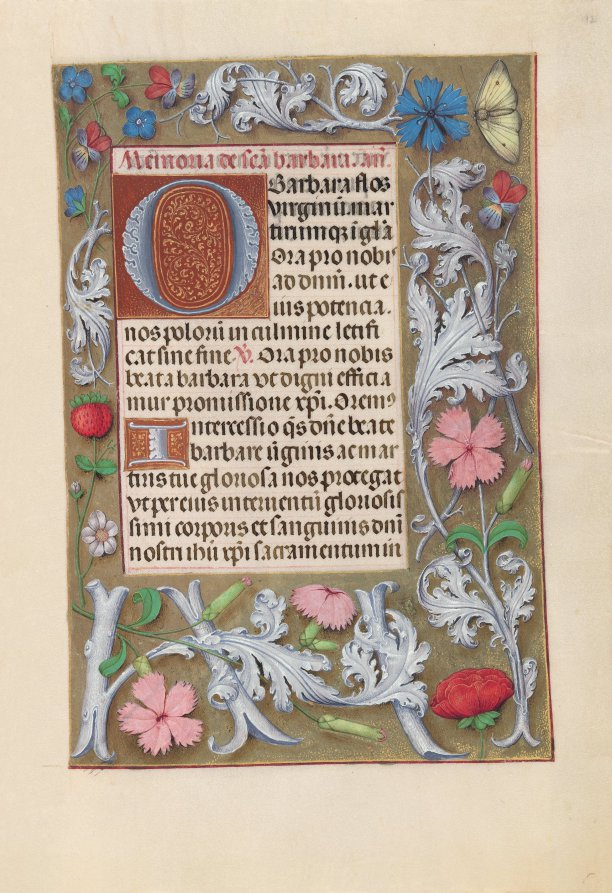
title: Hours of Queen Isabella the Catholic, Queen of Spain: Fol. 192r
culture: Flanders, Ghent and Bruges, late 15th century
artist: Master of the First Prayerbook of Maximillian (Flemish, c. 1444–1519)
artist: and Associates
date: c. 1500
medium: ink, tempera, and gold on vellum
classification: Bound Volume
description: This manuscript was illuminated by a circle of at least five highly organized manuscript painters active in the Flemish cities of Ghent and Bruges. The principal illuminator was Alexander Bening, who painted the majority of the book's miniatures. Manuscripts produced by this circle of artists are renowned for the decoration of their borders, which typically feature a rich variety of realistically-painted flowers, birds, and butterflies. This prayer book, called a book of hours, was intended not for a cleric, but for the private devotions of a lay person-in this case, Isabella the Catholic, Queen of Spain (1451-1504). Isabella's coat of arms embellishes the book's frontispiece. It is unlikely that the book was commissioned by the Queen herself; rather, she probably received it as a diplomatic gift from someone courting her patronage, perhaps Cardinal Francisco Jimenez de Cisneros. A Franciscan friar, Jimenez was dependent upon Isabella for his advancement, first to the post of Queen's confessor in 1492, and then to Archbishop of Toledo in 1495.